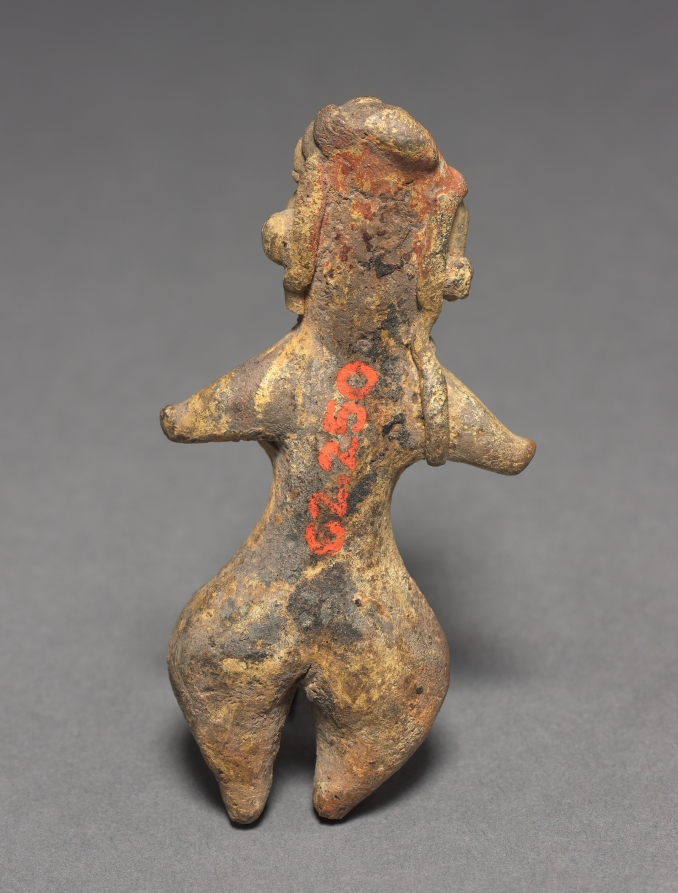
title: Standing Female Figurine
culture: Mesoamerica, Central Mexico, Tlatilco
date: 1200–400 BCE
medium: ceramic with pigment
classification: Ceramic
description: This figurine represents the best-known type found in graves at Tlatilco, an early farming village on the outskirts of Mexico City. The type is known as the “pretty lady” after its representatives’ sweet faces, fancy hairstyles, pinched waists, and flaring hips and thighs.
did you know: This figurine represents the best-known type found in graves at Tlatilco, an early farming village.